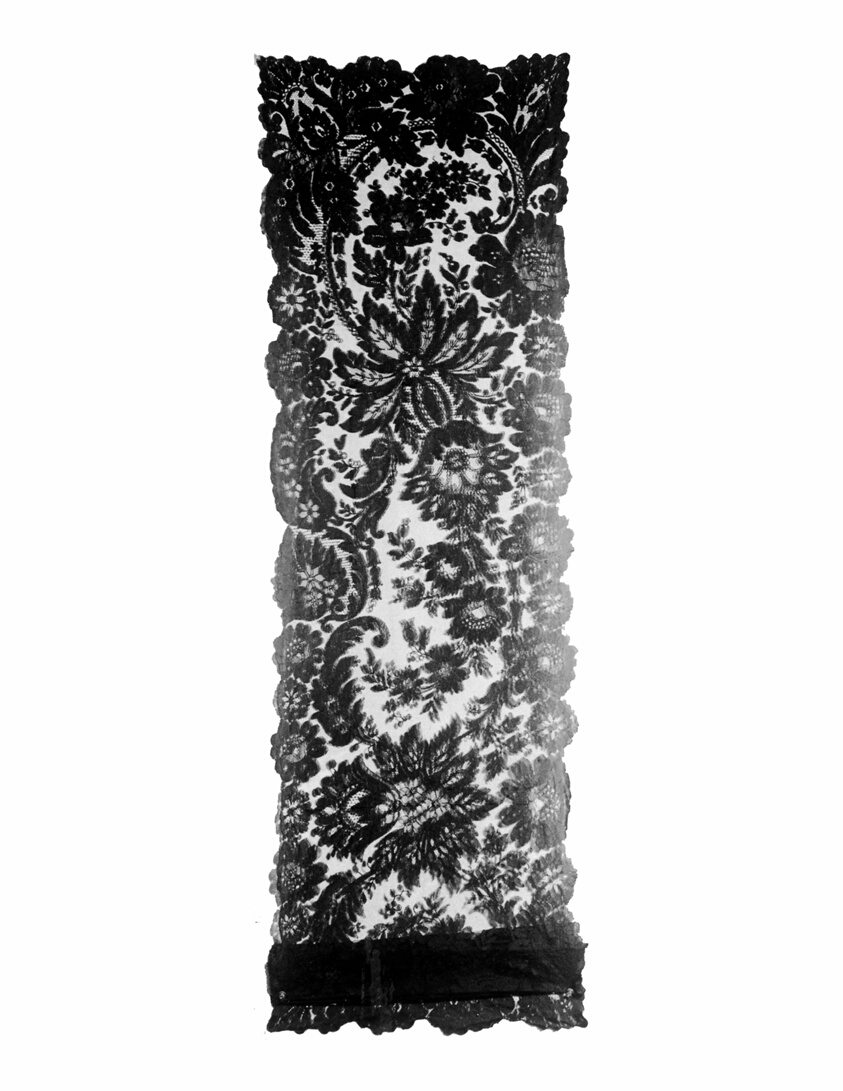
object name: Textile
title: Stole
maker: England or France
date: 1870/80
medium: Silk, Pusher machine lace imitation of "Blonde Matte" bobbin lace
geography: England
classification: textile; lace - machine